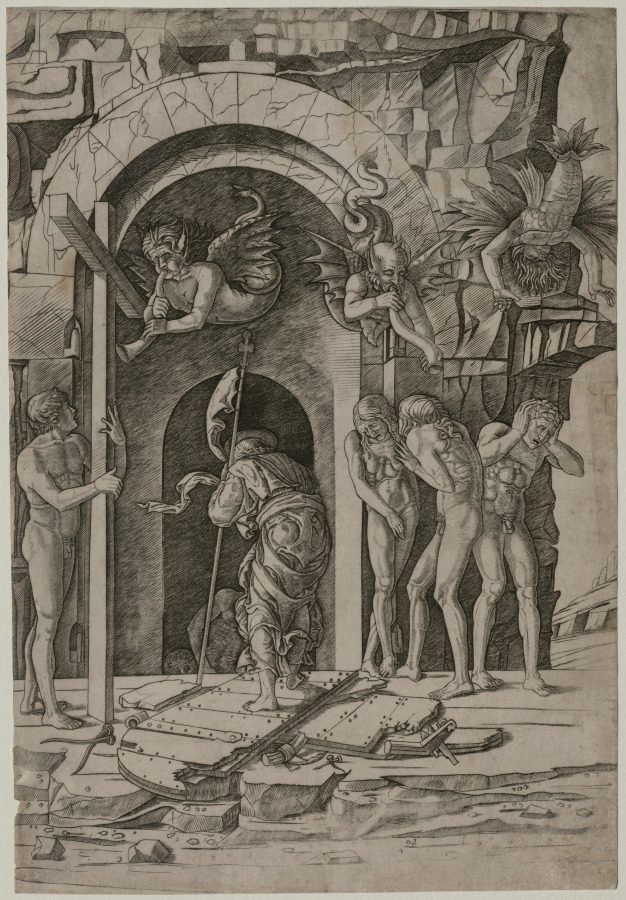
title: Descent into Limbo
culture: Italy, 15th century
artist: Giovanni Antonio da Brescia (Italian)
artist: after Andrea Mantegna (Italian, about 1431–1506)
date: c. 1490–1500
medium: engraving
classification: Print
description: This subject, also known as the Harrowing of Hell, recounts Christ’s descent into limbo, the first circle of hell, to liberate the souls of Old Testament saints. The church taught that those who lived and died in an era without the Christian sacraments were relegated to a lower place until Christ could come redeem them. Here Christ, holding the banner of the Resurrection, enters through a doorway. Broken from its hinges, the door has fallen to the ground over which Christ triumphantly walks. A group of figures await their redemption, including Adam and Eve to the right. Above, a group of demons emerge from the cavern, sounding trumpets to announce Christ’s arrival.